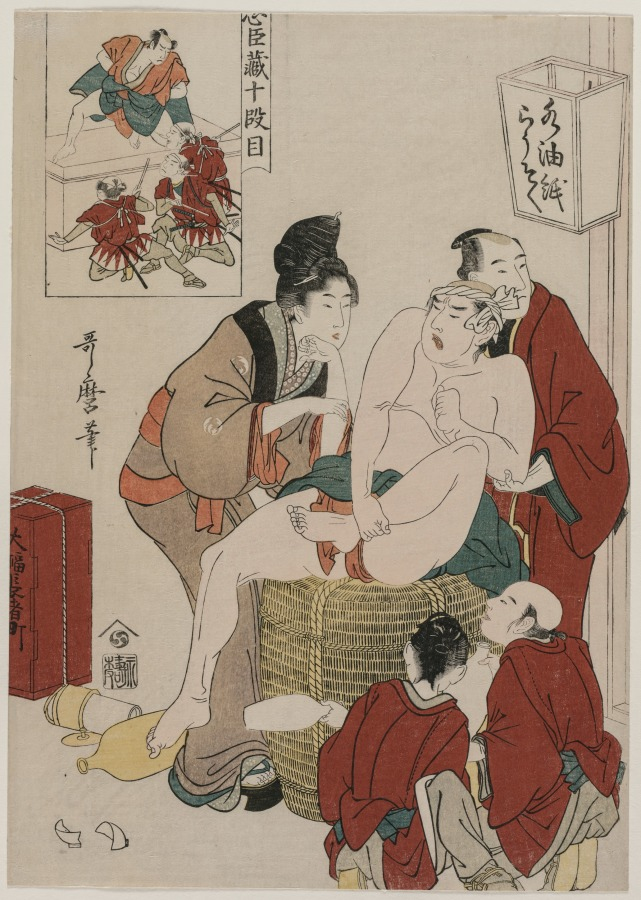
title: Chushingura: Act X of The Storehouse of Loyalty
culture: Japan, Edo period (1615–1868)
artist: Kitagawa Utamaro (Japanese, c. 1754–1806)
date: late 1790s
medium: color woodblock print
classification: Print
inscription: Artist's signature: Utamaro hitsu.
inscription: Publisher: Nishimuraya Yohachi (Eiju han, emblem).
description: Stage version: The hero Gohei bravely plants himself on a chest of armor and weapons to prevent government officials from discovering them before they are smuggled out of the house. He holds off the officials by claiming that the chest contains personal belongings of the lady of the house. Exposing these items would bring her humiliation and dishonor. See Chushingura: Perspective Picture for the "Treasure House of Loyalty" (CMA 1985.338.10). Parody print: Utamaro converted this moment of lofty bravery into one of humor. A drunkard guards a cask of sake to prevent the maid from opening it.